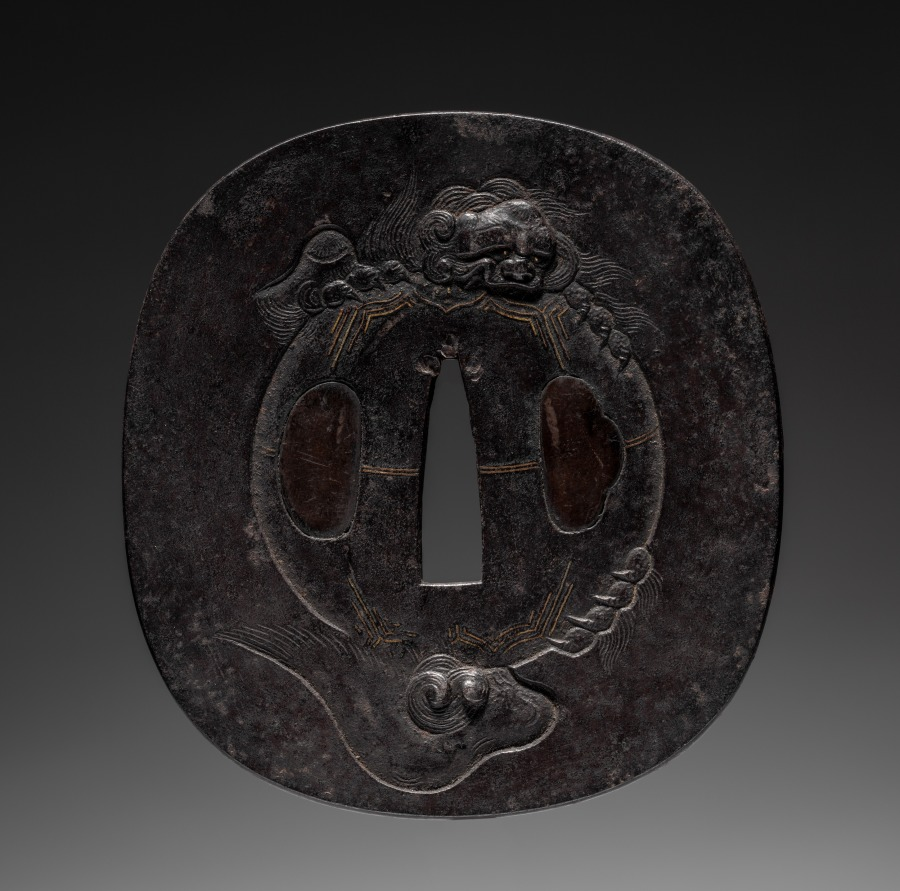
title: Sword Guard (Tsuba) with Peony and Lion with Ball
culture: Japan, possibly Edo period (1615-1868)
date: c. 1615–1868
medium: iron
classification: Arms and Armor